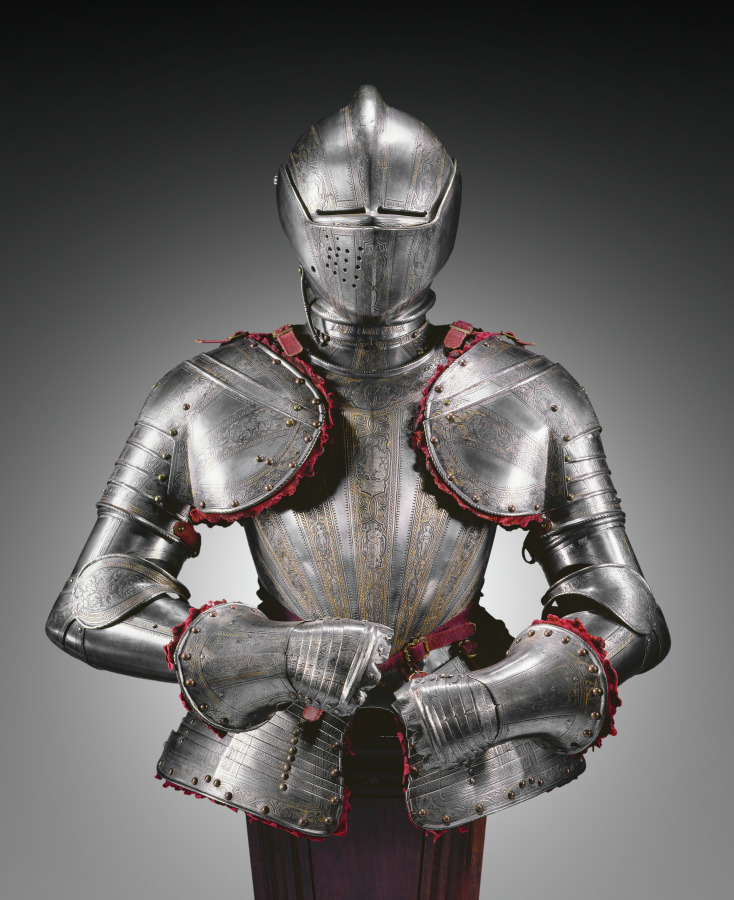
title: Half Armor for the Foot Tournament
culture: Italy, Milan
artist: Pompeo della Cesa (Italian, active 1572–93)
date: c. 1590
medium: etched and gilded steel, brass rivets, leather and velvet fittings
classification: Arms and Armor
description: This armor was designed for the foot tournament, an event that was separate from the equestrian jousts popularized during the Middle Ages and still favored among Renaissance aristocracies throughout Europe. Foot tournaments were commonly fought over a barrier that separated the combatants and gave protection to their legs, so a half-armor such as this one provided sufficient protection. The original owner of this suit would have worn it with colorful puffed and slashed britches and hose. The use of outlandish accessories, such as a large ostrich feather plume (a brass plume holder may be seen on the back of the helmet) and red velvet pickadils between the steel plates, provided additional splendor.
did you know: Pompeo della Cesa was the Armani or Gucci of the 1500s; everyone wanted to wear him.